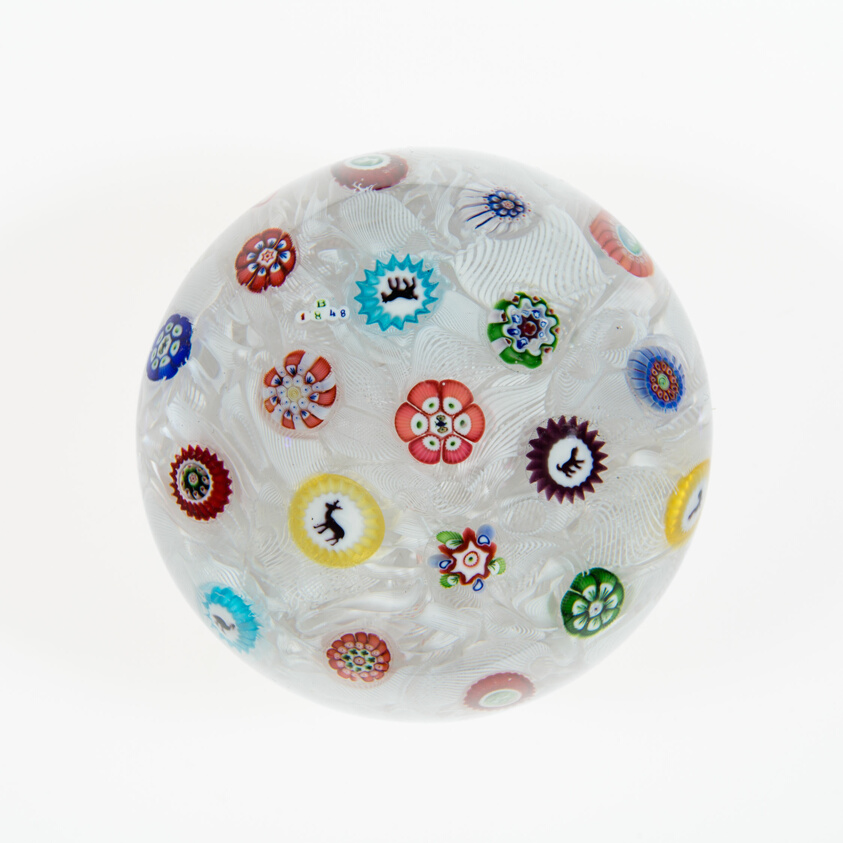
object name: Glass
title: Paperweight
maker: Baccarat Glassworks (Cristalleries de Baccarat); Lorraine, France, founded 1764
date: 1848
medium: Glass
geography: France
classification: paperweight; glass